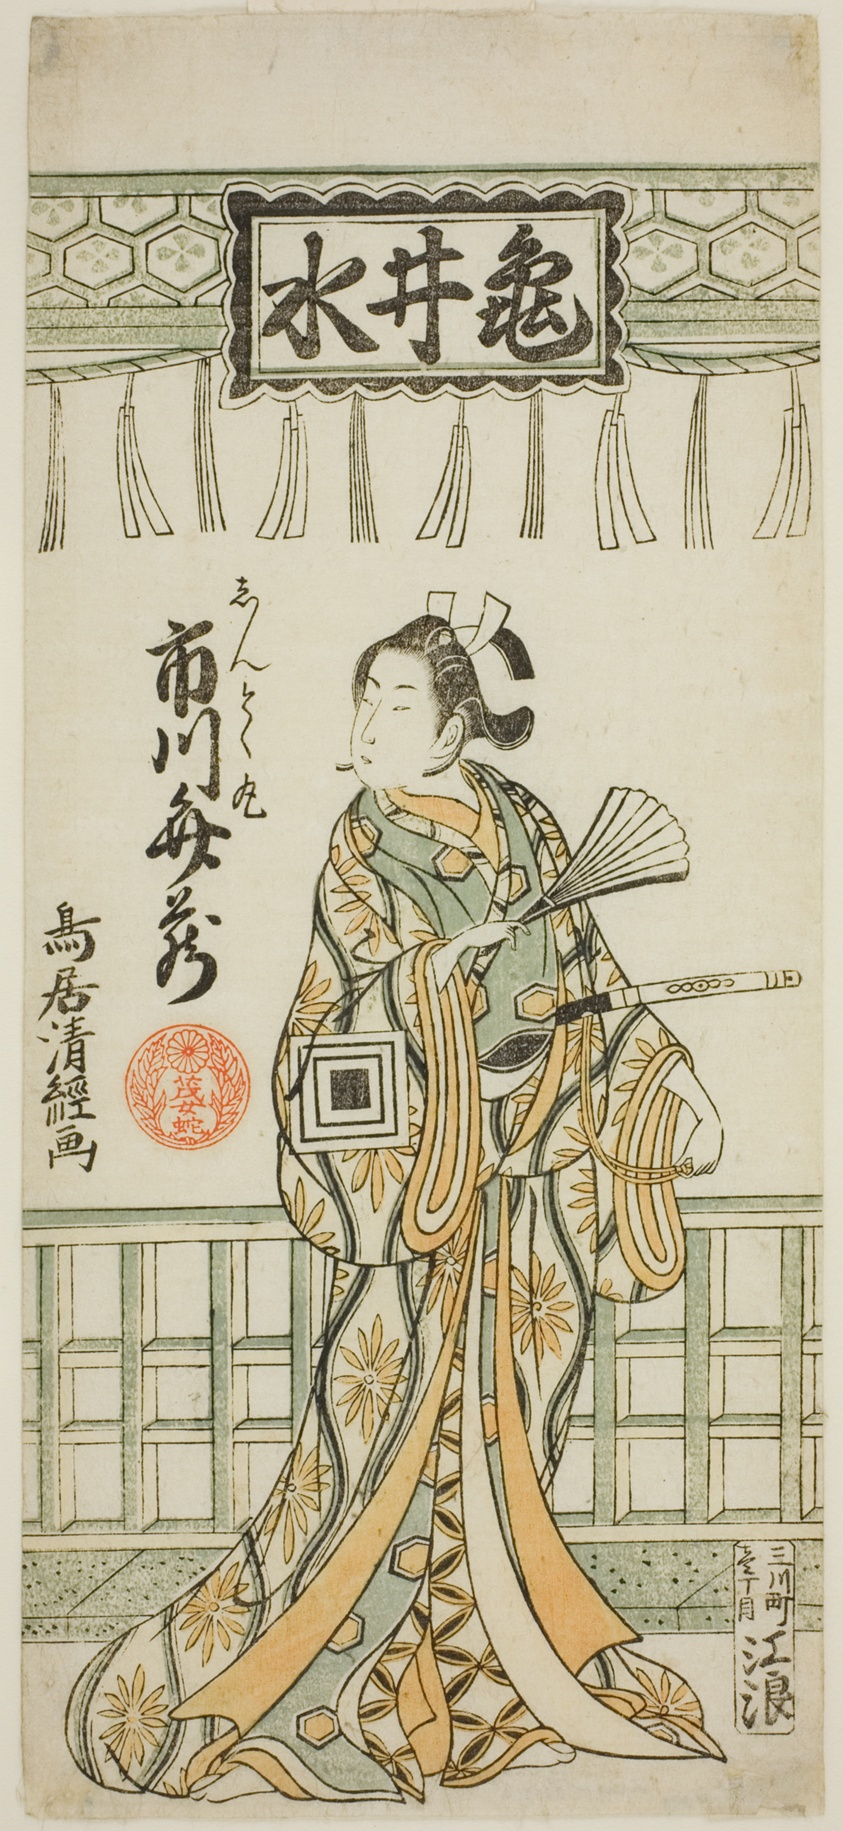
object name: Print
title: The Actor Ichikawa Benzo I as Shuntokumaru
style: Japanese (culture or style)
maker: Torii Kiyotsune (Japanese, active c. 1757-79)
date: c. 1767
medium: Color woodblock print; hosoban, benizuri-e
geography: Japan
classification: woodblock print; print; asian art